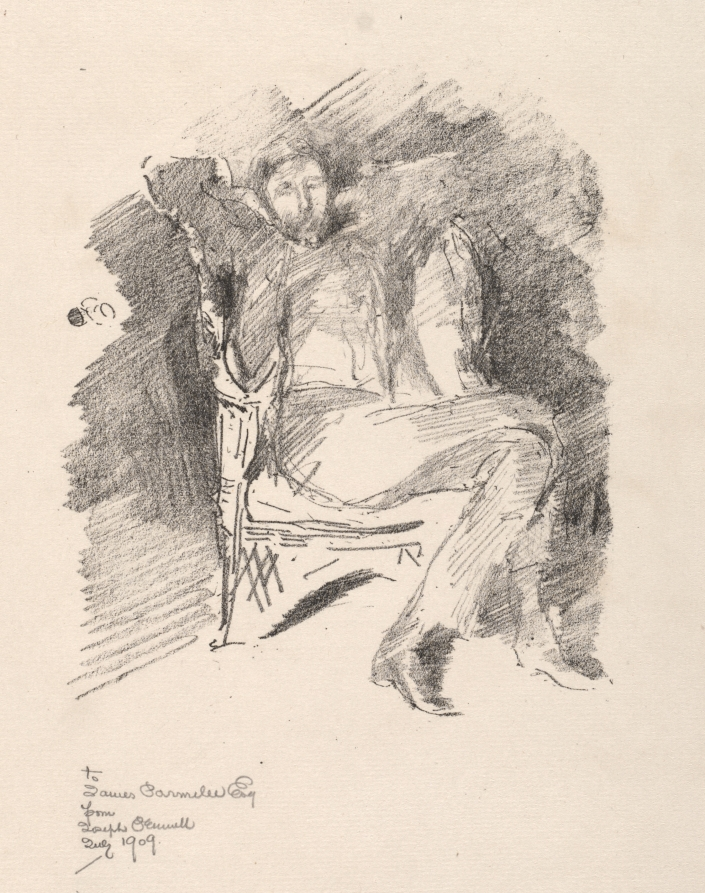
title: Joseph Pennell, No. 2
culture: America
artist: James McNeill Whistler (American, 1834–1903)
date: 1896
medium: lithograph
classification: Print